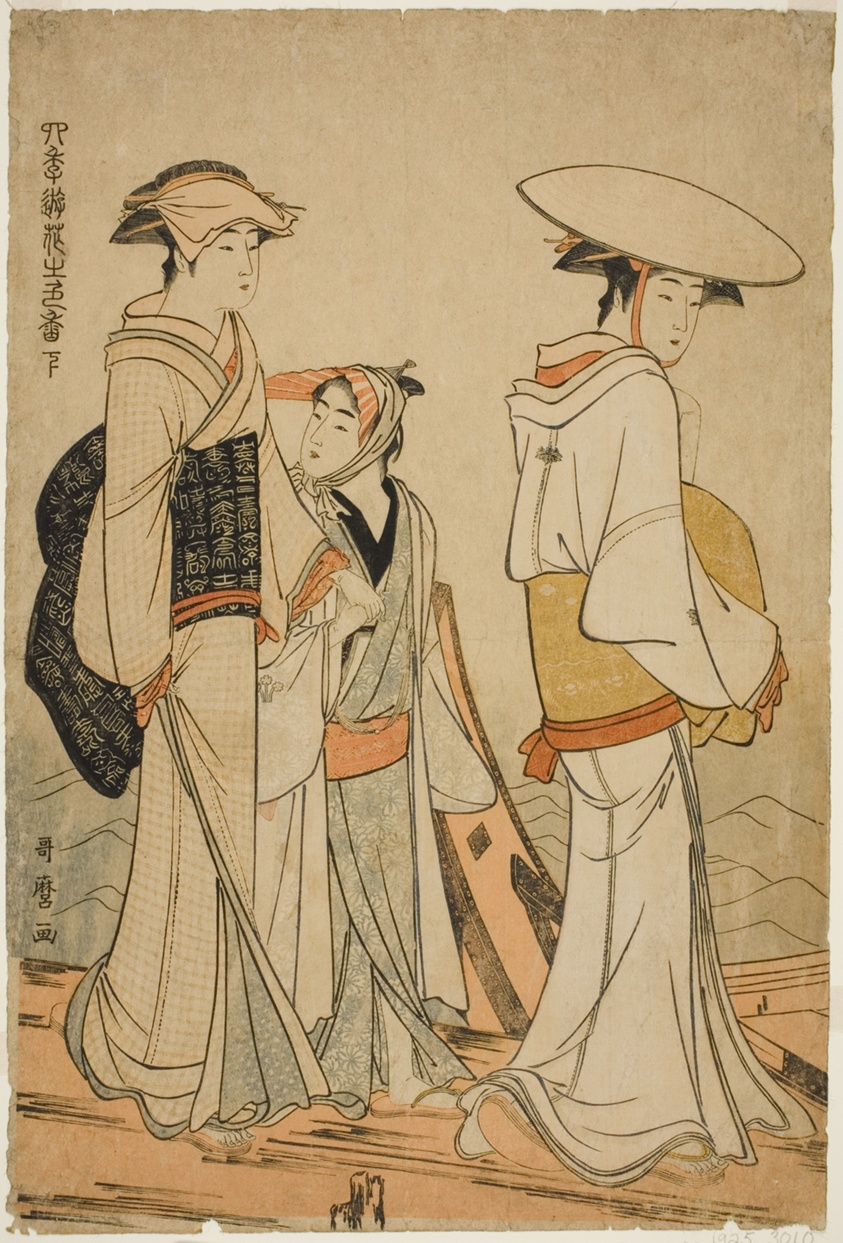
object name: Print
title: Pleasures of the Four Seasons: Colors and Scents of Flowers, left (Shiki no asobi hana no iroka, ge)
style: Japanese (culture or style)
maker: Kitagawa Utamaro 喜多川 歌麿; Japanese, 1753 (?)-1806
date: c. 1783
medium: Color woodblock print; left sheet of oban diptych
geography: Japan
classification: woodblock print; print; asian art